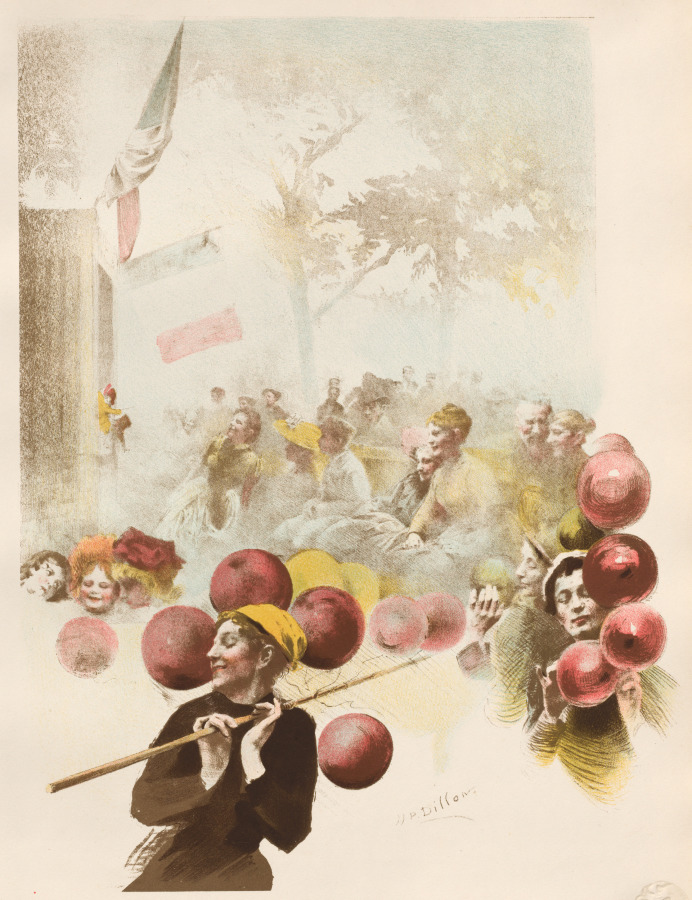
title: Polichinelle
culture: France, Paris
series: L'Estampe Moderne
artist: Henri Patrice Dillon (American, 1851–1909)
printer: Imprimerie Champenois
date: 1899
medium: Color lithograph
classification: Bound Volume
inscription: In plate: lower margin of image: H. P. Dillon; lower right corner: blindstamp of l'Estampe Moderne (Lugt 2790)